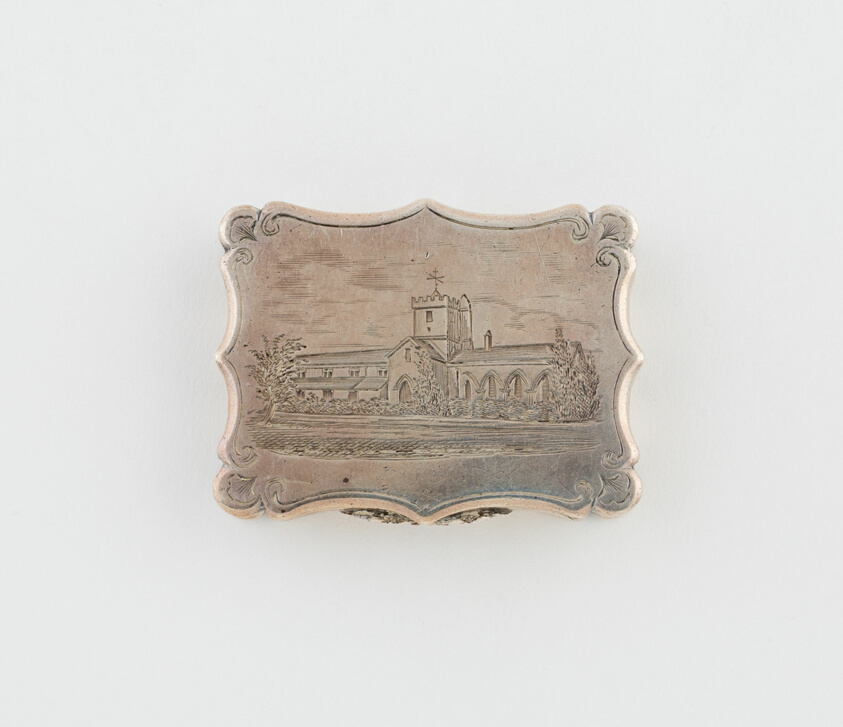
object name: Metalwork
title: Vinaigrette with View of St Bega's Priory, Cumbria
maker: Nathaniel Mills; Birmingham, England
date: c. 1842/43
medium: Silver and silver gilt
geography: Birmingham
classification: container for personal use; vinaigrette (container for health care); european decorative arts; metalwork; silver; decorative object/ornament